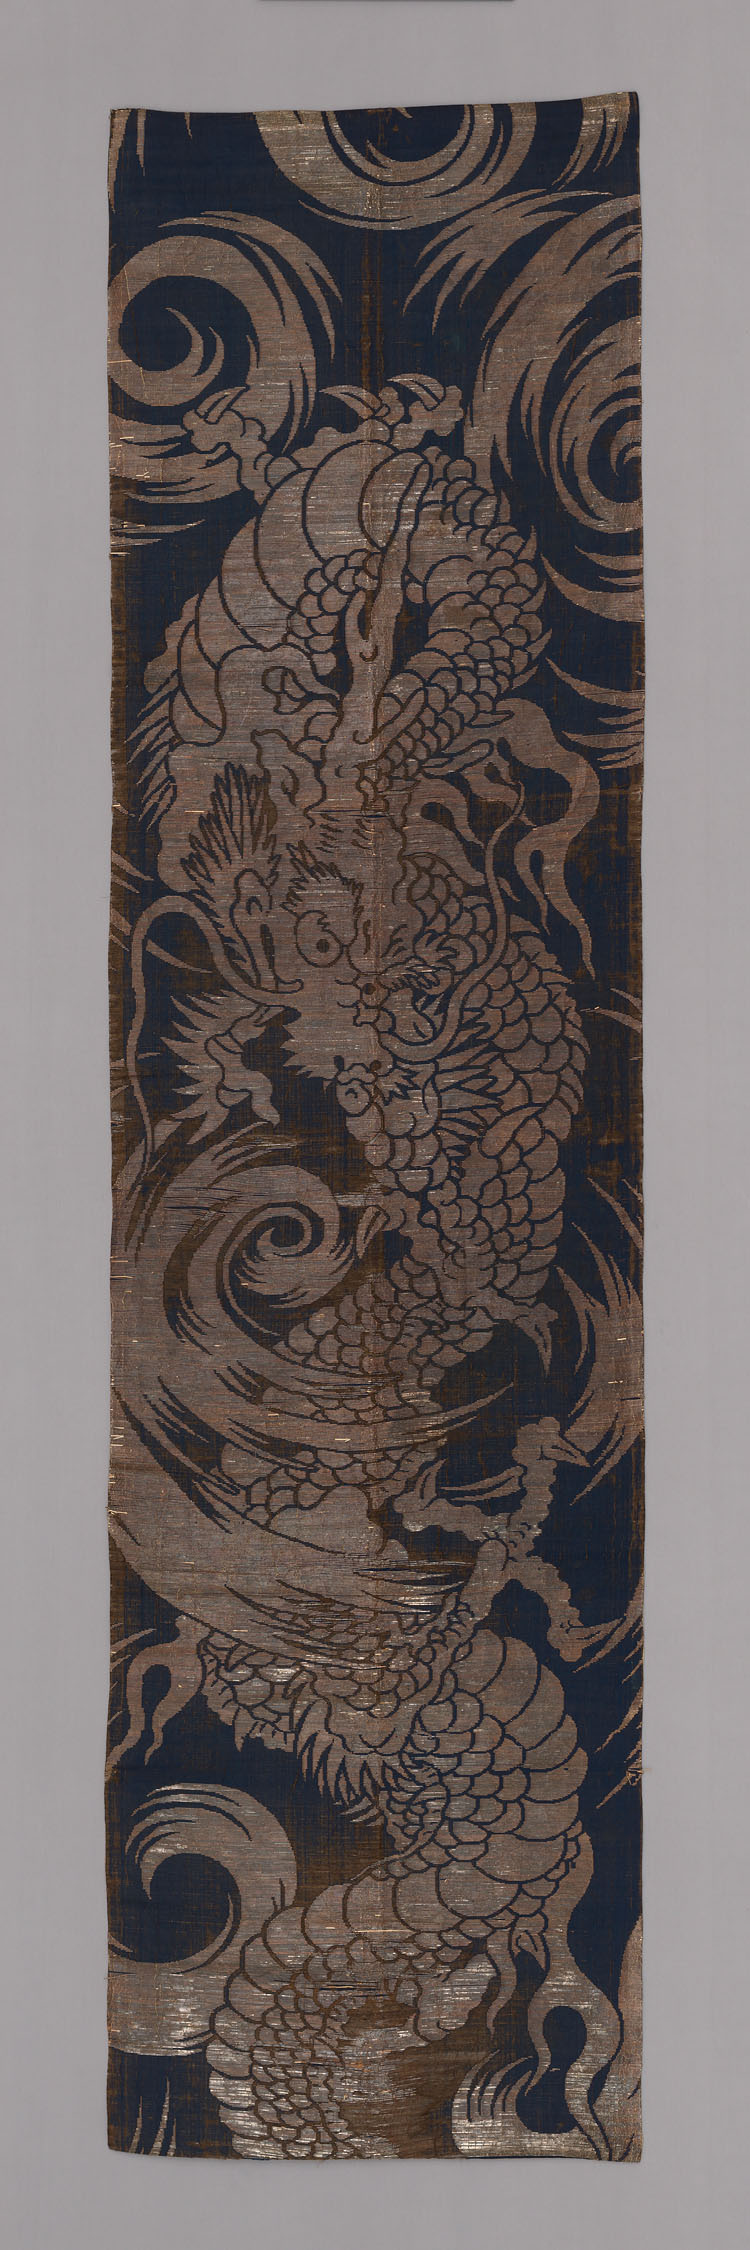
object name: Textile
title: Tobari (Temple Banner Fragment)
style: Japanism, late edo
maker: Japan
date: late Edo period (1789–1868), 1800/50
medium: Silk and gold-leaf-over-lacquered-paper strip, warp-float faced 3:1 ‘Z’ twill weave with weft-float faced 1:3 twill interlacings of secondary binding warps and supplementary patterning wefts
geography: Japan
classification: textile; liturgical - buddhist; weaving